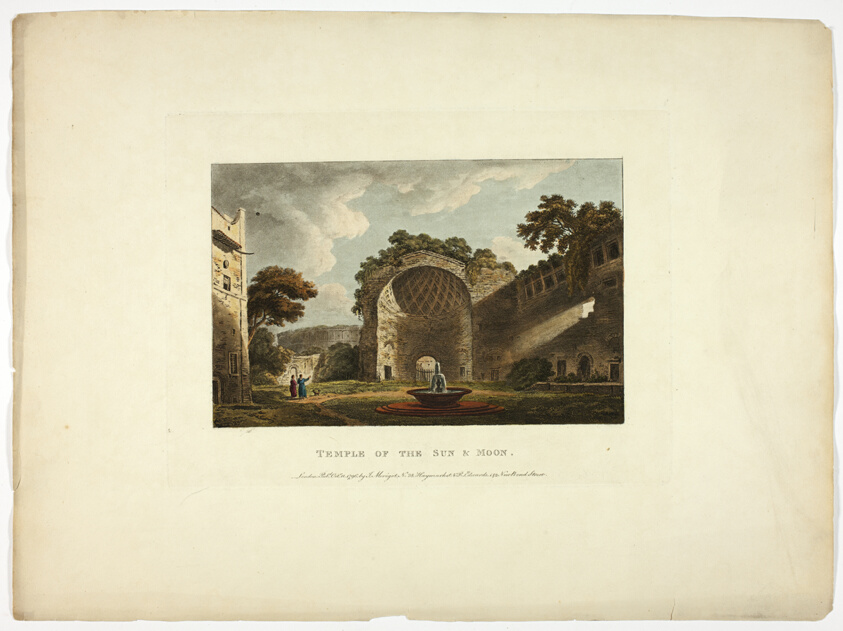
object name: Print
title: Temple of the Sun & Moon, plate two from Ruins of Rome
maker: M. Dubourg, (English, active 1786-1838); published by J. Merigot (Italian, Unknown)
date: published March 1, 1796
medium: Hand-colored aquatint on paper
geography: England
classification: aquatint; print; prints and drawing